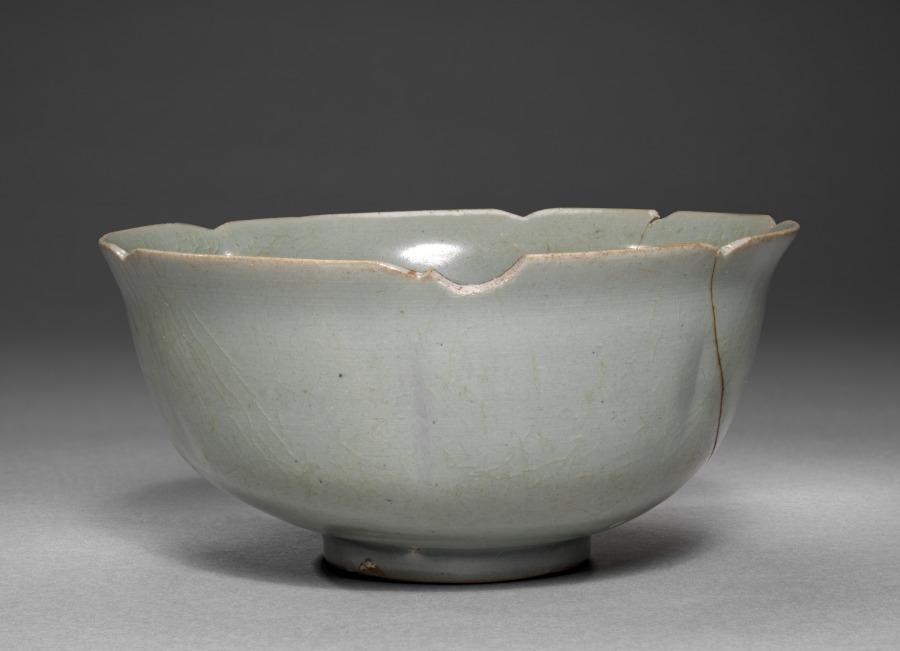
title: Floral-shaped Bowl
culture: Korea, Goryeo dynasty (918–1392)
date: 1100s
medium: Ceramic, glazed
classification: Ceramic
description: Celadons, spoons, seals, and bronze mirrors were the most common burial objects in tombs during the Goryeo period (918–1392). Furnishing tombs with an elaborate assemblage of objects was believed to honor and comfort the newly dead. Generally, Goryeo tombs were left untouched until the late 19th century. During the colonial period (1910–45), however, Japanese archaeologists competitively excavated the tombs located in Kaeseong, the former capital of the Goryeo period. This elegant floral-shaped cup was probably one of those grave goods excavated during the Japanese colonial period.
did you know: Elites of the Goryeo period are known for their love of drinking tea and wine. This type of delicate-looking cup not only made their drinking experience more enjoyable, but also showed their refined taste.